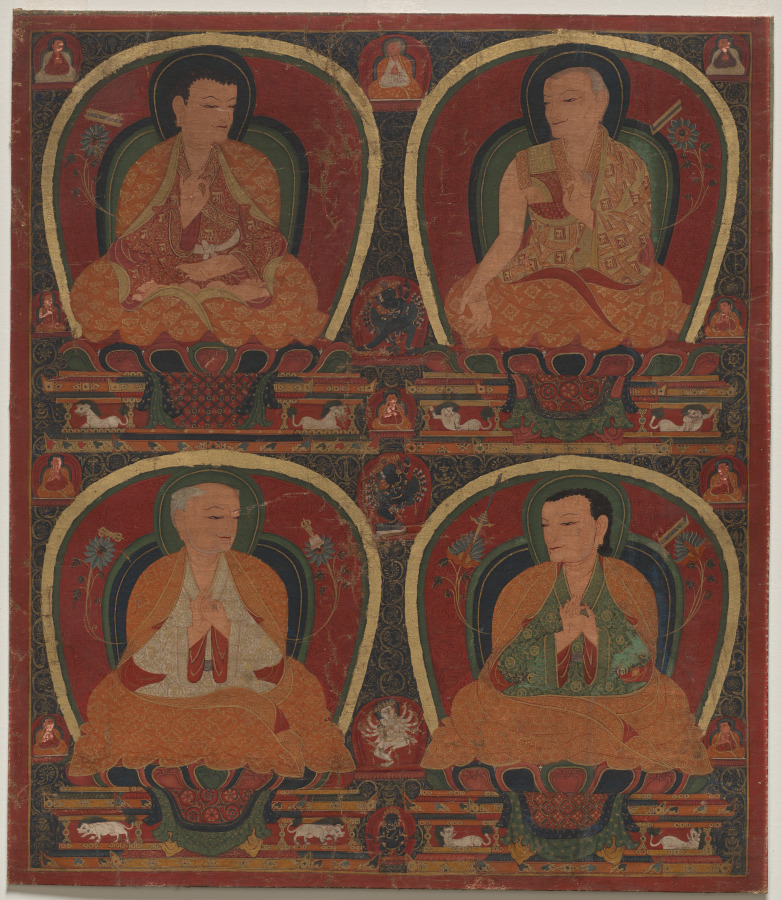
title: Four seated Masters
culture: Central Tibet, Ngor monastery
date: c. 1450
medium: Gum tempera and gold on cotton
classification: Painting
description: Founders and prominent masters of the Sakya order of Buddhism in Tibet are featured in this painting as part of the lineage of teachers who transmitted knowledge of their fundamental text, the Hevajra Tantra. It is part of a series of paintings made at one of the main Sakya monastic centers, which had close ties with Nepal. This Tibetan artwork includes Nepalese features, such as the delicate, decorative quality of the painting, its two-dimensionality, the exaggerated curvature of the upper eyelid, and the filling of all spaces with scrollwork.